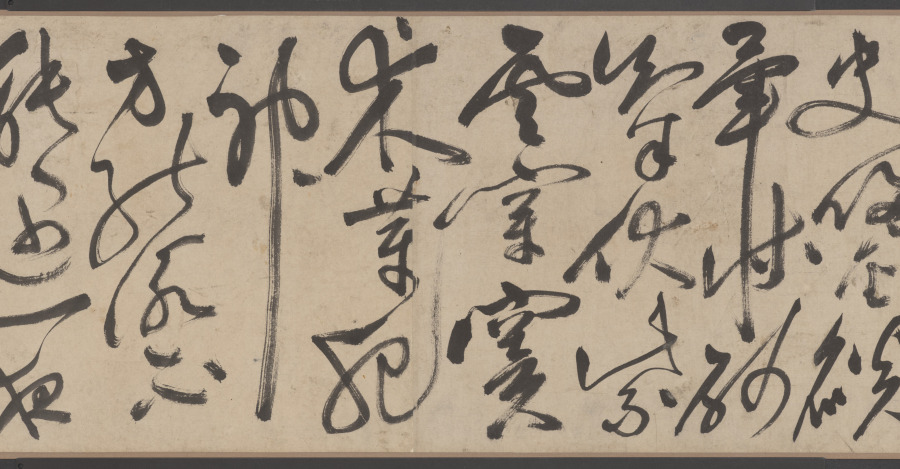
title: Retreat on an Autumn Day, in Cursive Script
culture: China, Ming dynasty (1368–1644)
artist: Zhu Yunming (Chinese, 1460–1527)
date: dated 1523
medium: Handscroll; ink on paper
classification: Calligraphy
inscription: 款識：讌於從一堂，爛漫醉書。癸未（1523）七月晦日也。枝山允明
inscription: 《閒居秋日》逃暑應能蹔閉關，未消多把古賢攀。並拋杯酌方為懶，少事篇章恐礙閑。風墮一庭鄰寺葉，雲開半面隔城山。浮生只說潛居易，隱比求（脫「名」）事更艱。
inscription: 《句曲道中》老至誰憐晝錦明，春來聊得客襟清。宵依星斗宮壇臥，曉（脫「入」）神仙宅舍行。眼看山多城郭少，肩挑詩重簿書輕。何時總入煙霞去。不見人間寵辱驚。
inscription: 《登茆峰》下馬門前一振衣，翠微高迥逼清微。雲端洞裡仙人過，月下山中長史歸。金焰暈牀砂氣伏，紫雲穿竇朮芽肥。神方能詠不能遇，一夜爽靈峰外飛。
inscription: 鈐印：「晞哲」、「允明」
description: This masterwork of calligraphy by Zhu Yunming from Suzhou combines two poems by the artist in cursive script style, characterized by its uninhibited, swift, and intuitive brushwork, so powerful that it here dissolved characters into dots or lines. Written from right to left and top to bottom and alternating in light dry to deep saturated ink, single characters may take a whole column or extend into the next one. Following the movement of the brush, they seem to dance over the paper.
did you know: Zhu Yunming stated that he was in an inebriated state when he created this work.